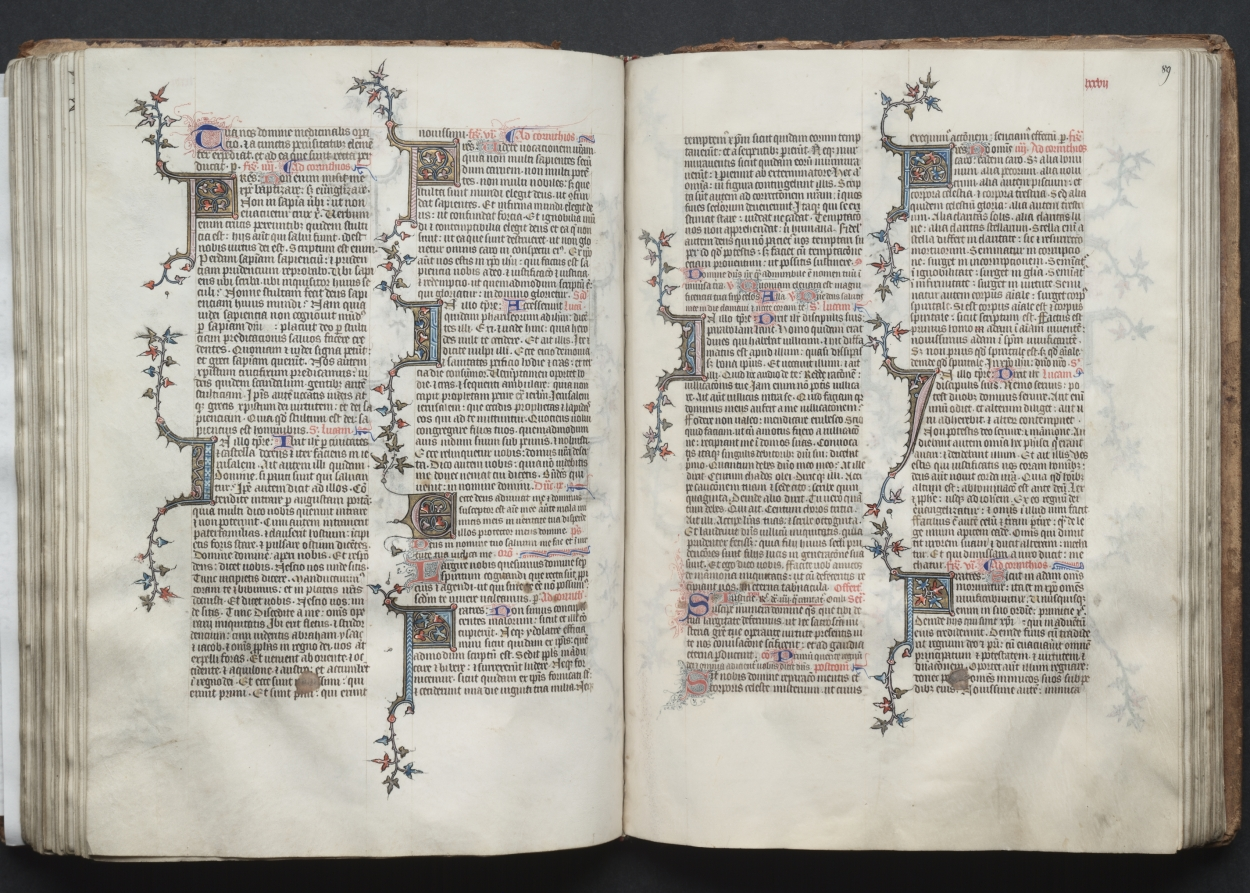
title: The Gotha Missal: Fol. 88v, Text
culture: France, Paris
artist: Master of the Boqueteaux (French)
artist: and Workshop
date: c. 1375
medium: ink, tempera, and gold on vellum; blind-tooled leather binding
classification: Bound Volume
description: The style and quality of this manuscript's decoration is typical of deluxe Parisian books made for aristocratic or royal patrons. Most of the book's decoration appears to be the work of the Master of the Boqueteaux, an artist active at the court of King Charles V (died 1380). His style was apparently shared by a number of book illuminators working in and around Paris. It is very possible that the Gotha Missal belonged to Charles V, but is not provable because the manuscript has no royal portraits and lacks a colophon. Given the book's magnificent decoration, however, it would seem that it was produced for a Valois prince, if not for the king himself. The manuscript receives its name from the German dukes of Gotha, its later owners.